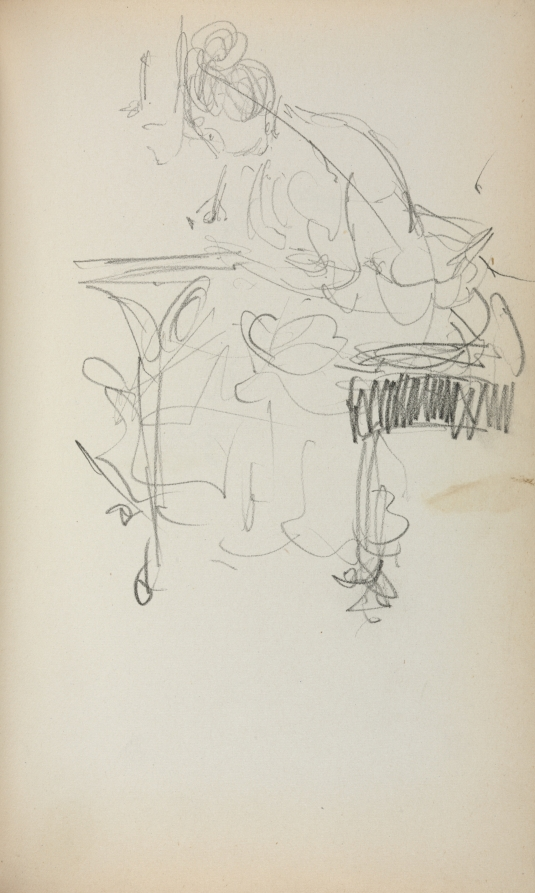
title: Italian Sketchbook: Seated Woman Sewing (page 153)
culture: America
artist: Maurice Prendergast (American, born Newfoundland [now Canada], 1858–1924)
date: 1898–1899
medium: pencil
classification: Bound Volume